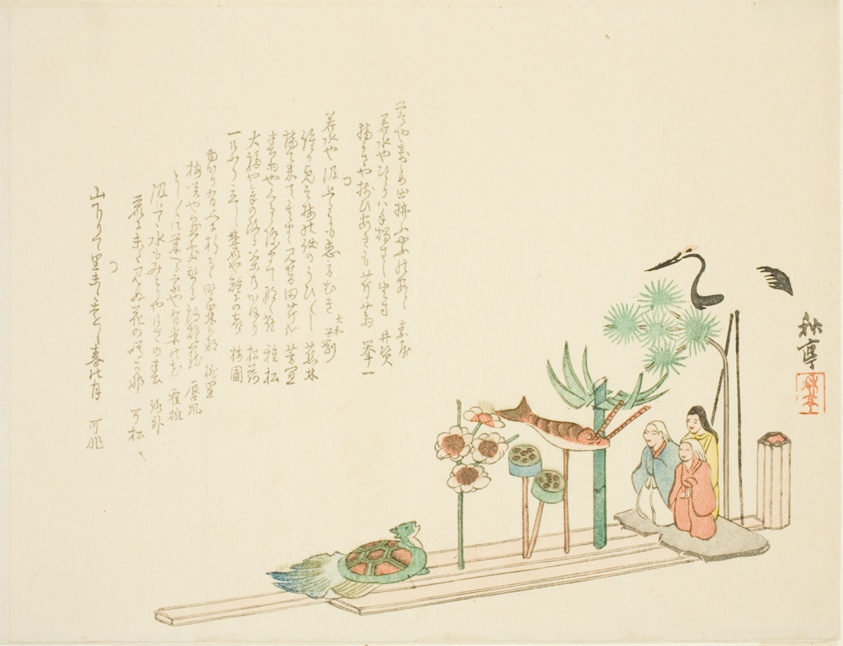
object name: Print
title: Longevity symbols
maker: Tanaka Shutei (Japanese, 1810-1858)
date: 1870s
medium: Color woodblock print; surimono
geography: Japan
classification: print; asian art